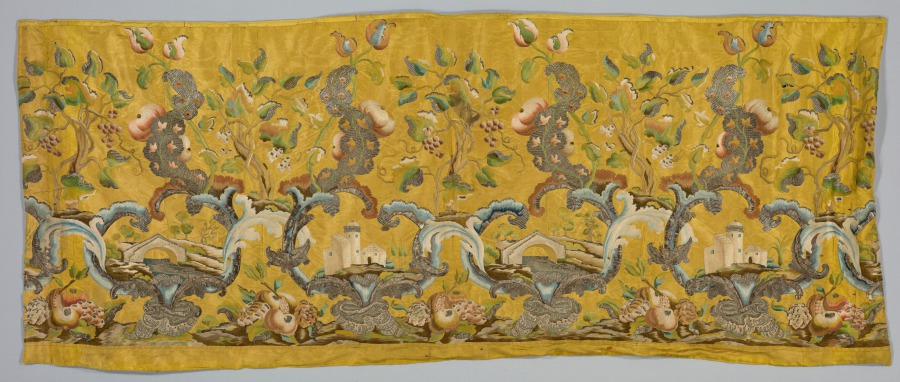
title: Embroidered Band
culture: Italy, 18th century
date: 1700s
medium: embroidery; silk and metallic threads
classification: Embroidery